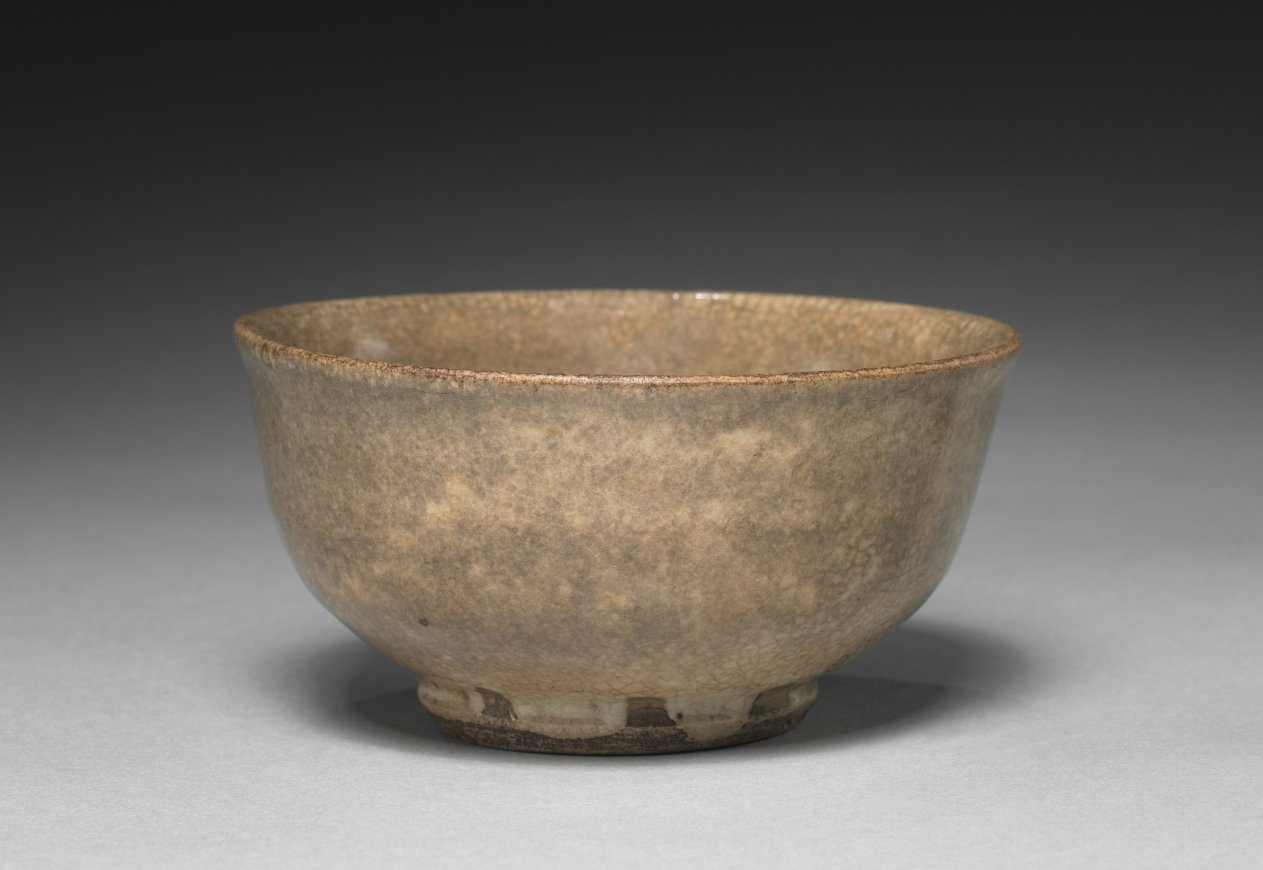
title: Bowl with White-slip Decorations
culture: Korea, Joseon dynasty (1392–1910)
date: 1500s–1600s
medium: glazed stoneware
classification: Ceramic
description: This type of wide-mouthed bowl was used every day in Korea, not exclusively for tea drinking. But when it was introduced to Japan around the early 1500s, its imperfect appearance, which evokes the aesthetics of wabi-sabi, caused it to be repurposed as a tea bowl. Korean tea bowls were circulated as a item of foreign luxury among Japanese military elites. Many Korean potters were abducted during the Japanese invasions (1592–98). Some settled there, and ended up leading the development of ceramic industry in Japan.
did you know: This type of humble tea bowl was highly praised among Japanese collectors for its imperfect beauty.